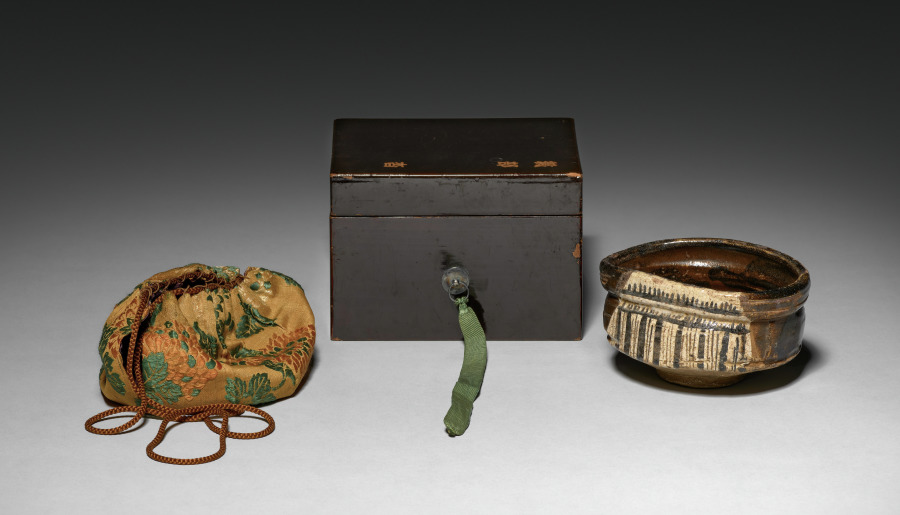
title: Clog-shaped Teabowl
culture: Japan, Momoyama period (1573–1615)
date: early 1600s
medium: Glazed stoneware (Mino ware, Oribe type)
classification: Ceramic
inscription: Mark: cross on base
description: Tea gatherings are fundamental to Japanese culture. Teabowls like this one are the most important objects used in tea practice. Its oblong shape and bold abstract designs are the signature style of the time period in which it was produced. That style is called Oribe, named for the tea master who championed the aesthetic.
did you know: Oribe is a government position. It means the person in charge of textiles.